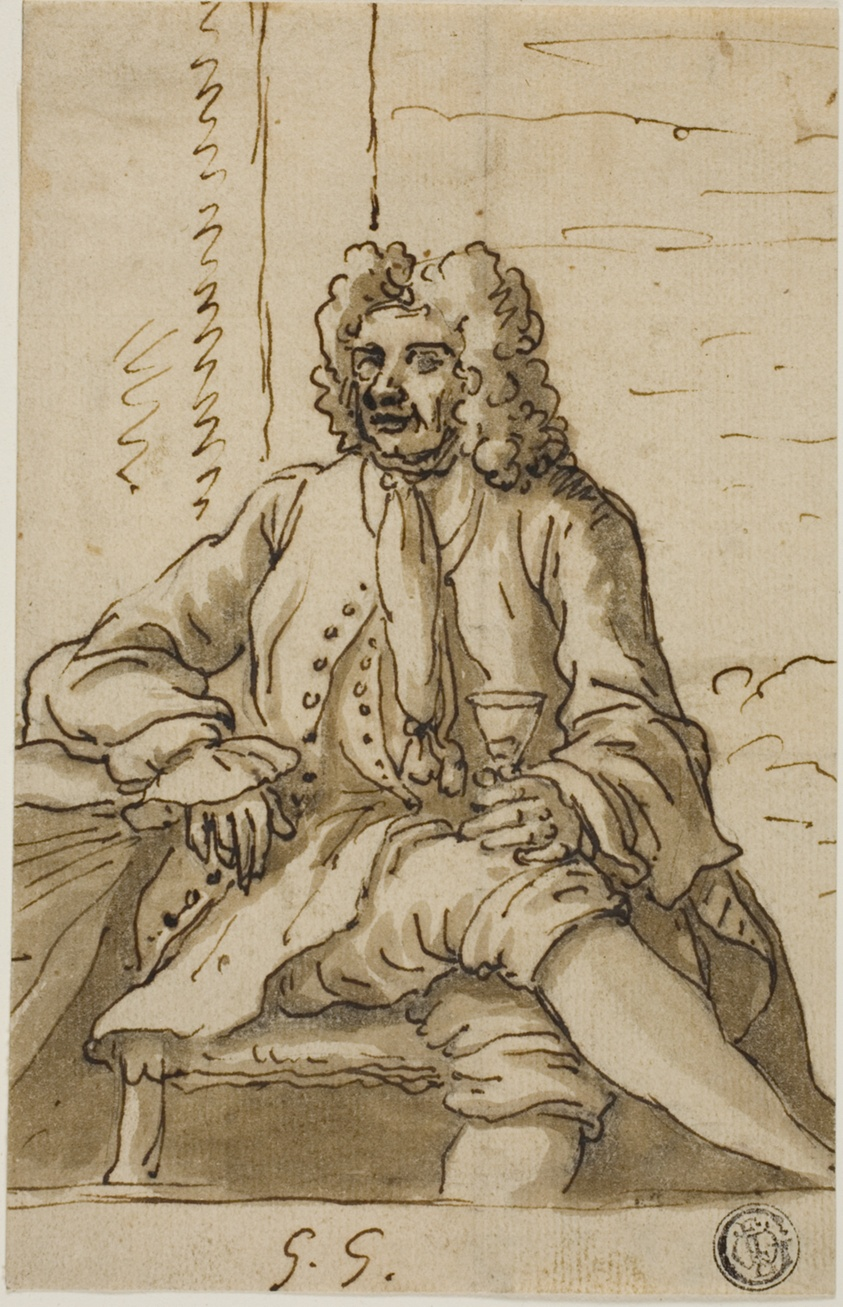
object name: Drawing and Watercolor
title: Grinling Gibbons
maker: James Thornhill (English, 1675-1734)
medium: Pen and brown ink with brush and brown wash, over graphite, on cream laid paper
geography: England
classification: pen and ink drawings; drawings (visual works); prints and drawing